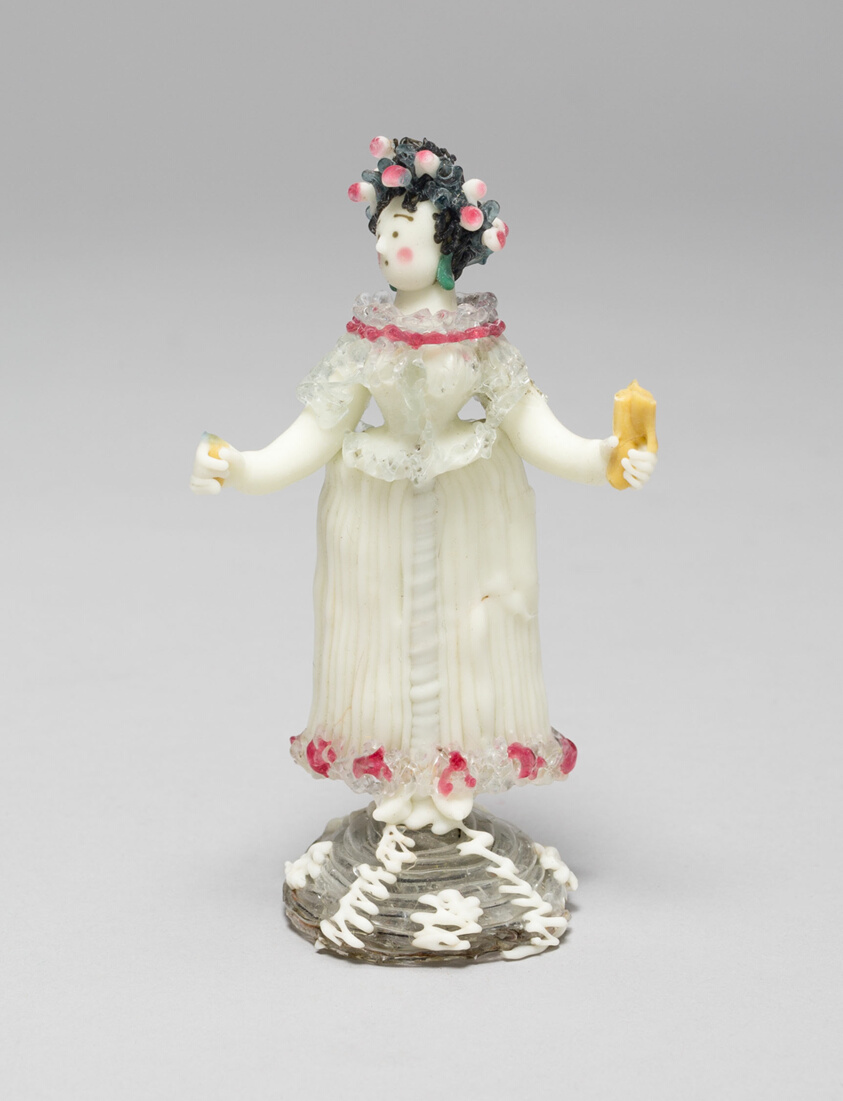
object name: Glass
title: Woman in a Wide Skirt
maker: Nevers, France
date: 1750/99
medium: Glass; lampwork (verre de Nevers), metal armature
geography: France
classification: decorative object/ornament; lampwork; glass; european decorative arts